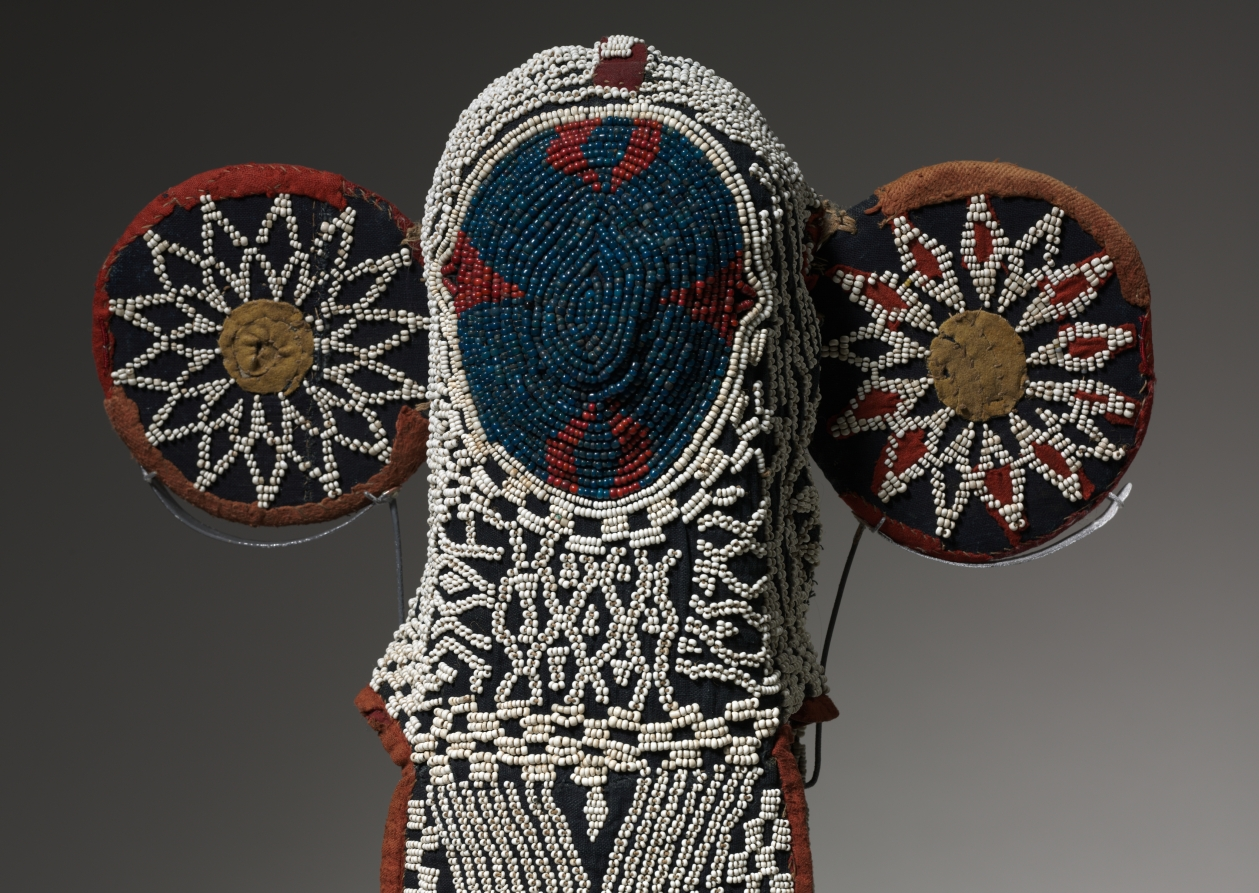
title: Mask (mbap mteng): Elephant (aka)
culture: Africa, Central Africa, Cameroon, Grassfields region, Bamileke-style maker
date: early 1900s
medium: Cotton, burlap, glass beads, twine, leather, and wood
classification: Mask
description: The name given to masks like this, mbap mteng, means "animal with huge ears." In the Cameroon Grassfields kingdoms, the elephant signifies power, authority, prestige, and leadership. The colorful glass beads that decorate the mask’s surface were imported from Venice and Bohemia (in Europe) and signal wealth and prosperity. Its geometric patterns include triangles that evoke the leopard, another animal linked with royal power. Members of Kuosi, an elite male society, wore such elephant masks for ritual dances and funerary ceremonies. This mask would have been worn with a costume that included a feather headdress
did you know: Performers wore elephant masks with indigo-dyed robes, red feather headdresses, and leopard pelts. Leopards and elephants symbolized royal power.